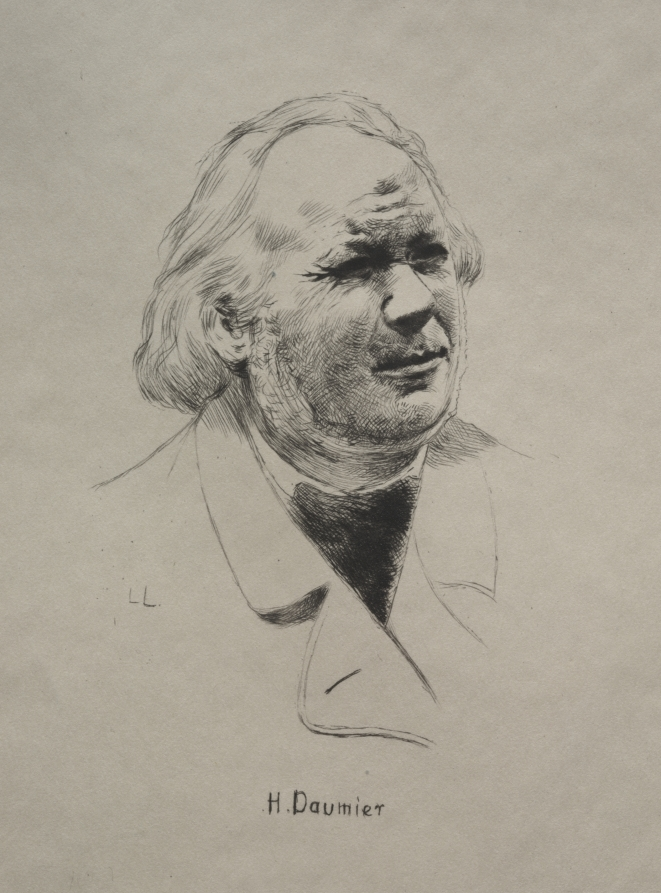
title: Honoré Daumier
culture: France, 19th century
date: 1800s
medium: drypoint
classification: Print